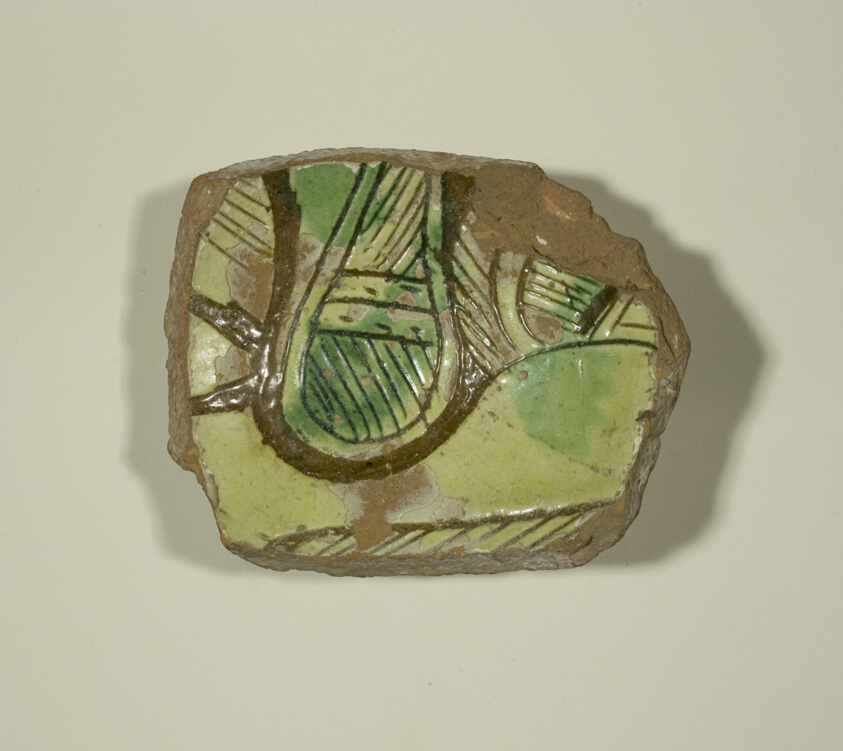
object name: Decorative Arts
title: Fragment of a Bowl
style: byzantine, european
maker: Byzantine (Greece, Serres or Cyprus)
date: 13th-14th century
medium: Ceramic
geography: Thessaloníki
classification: fragment; ceramics; vessel; bowl; asian art; decorative arts